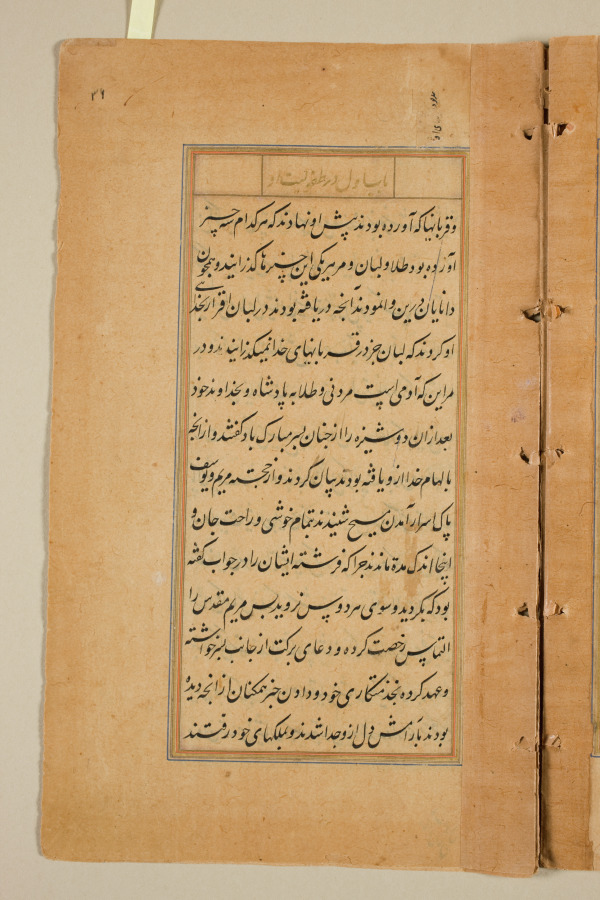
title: Text page from a Mirror of Holiness (Mir’at al-quds) of Father Jerome Xavier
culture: Mughal India, Allahabad, made for Prince Salim (1569–1627)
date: 1602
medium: Ink and gold on paper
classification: Manuscript